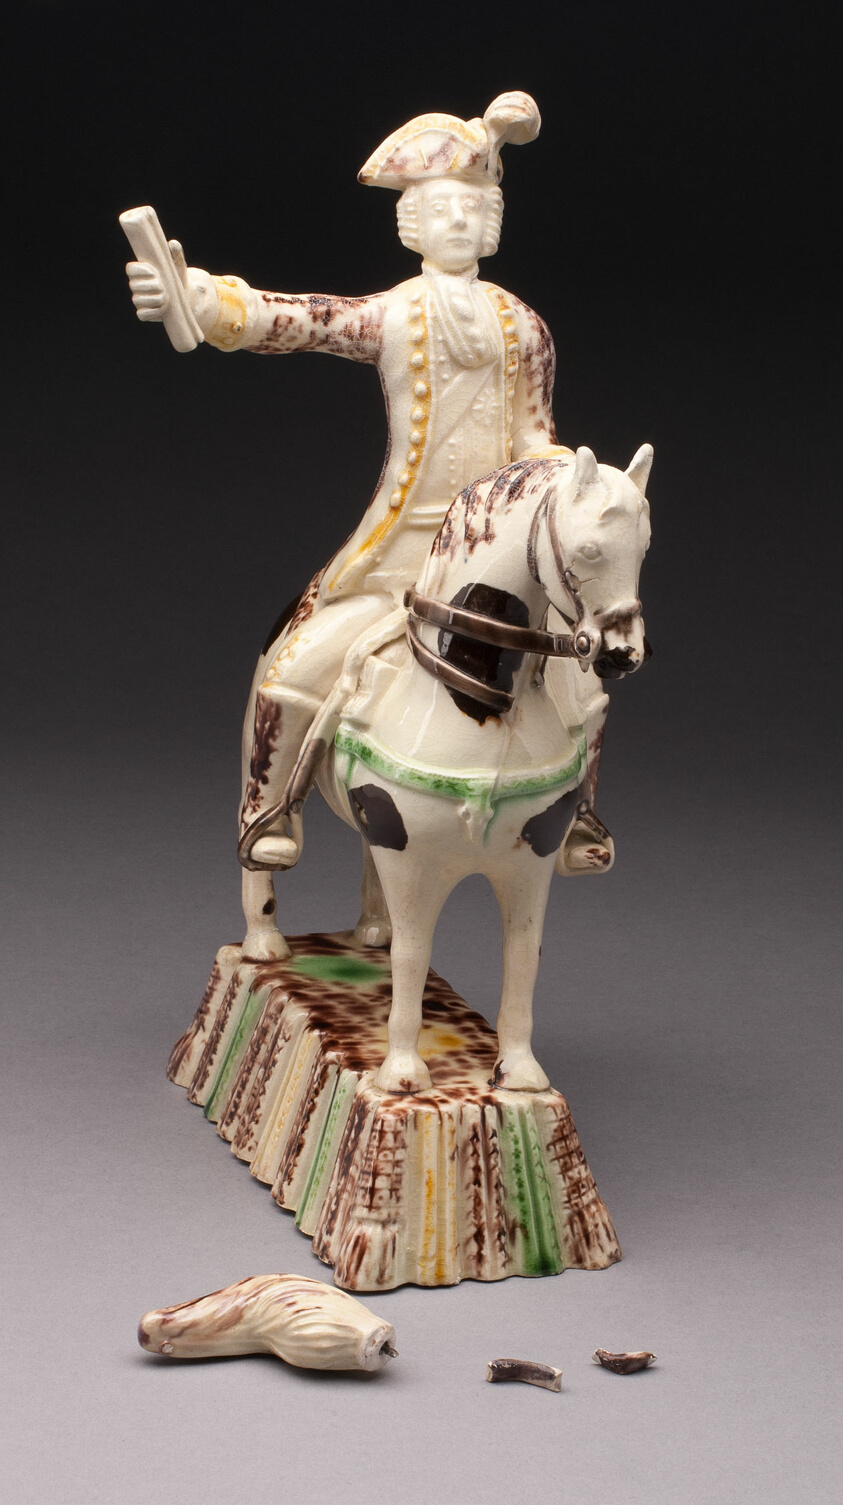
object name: Ceramics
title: Equestrian Figure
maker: England, Staffordshire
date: 1750/65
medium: Lead-glazed earthenware (creamware and redware)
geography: Staffordshire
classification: earthenware; creamware; european decorative arts; redware; ceramics; lead-glazed earthenware